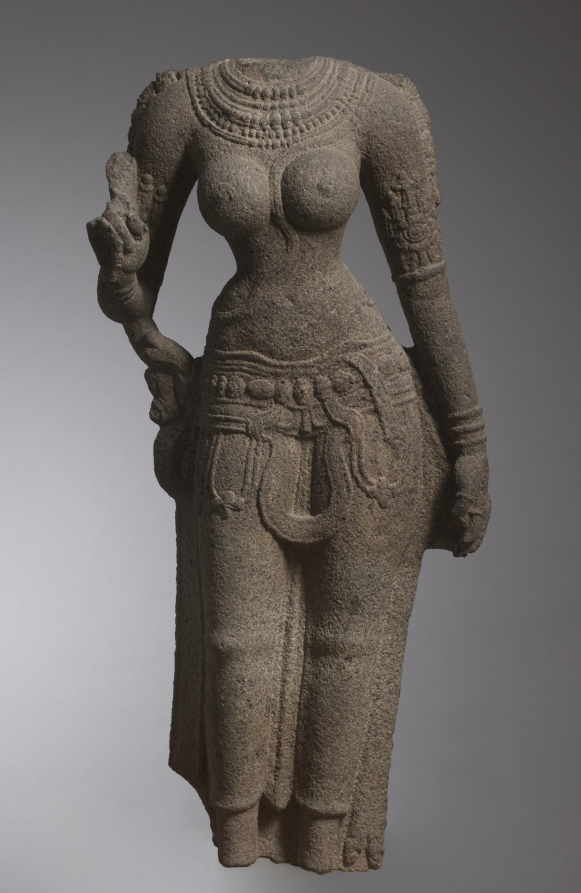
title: (Parvati) Devi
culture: South India, Chola period (900–1200s)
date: 1000s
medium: granite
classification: Sculpture